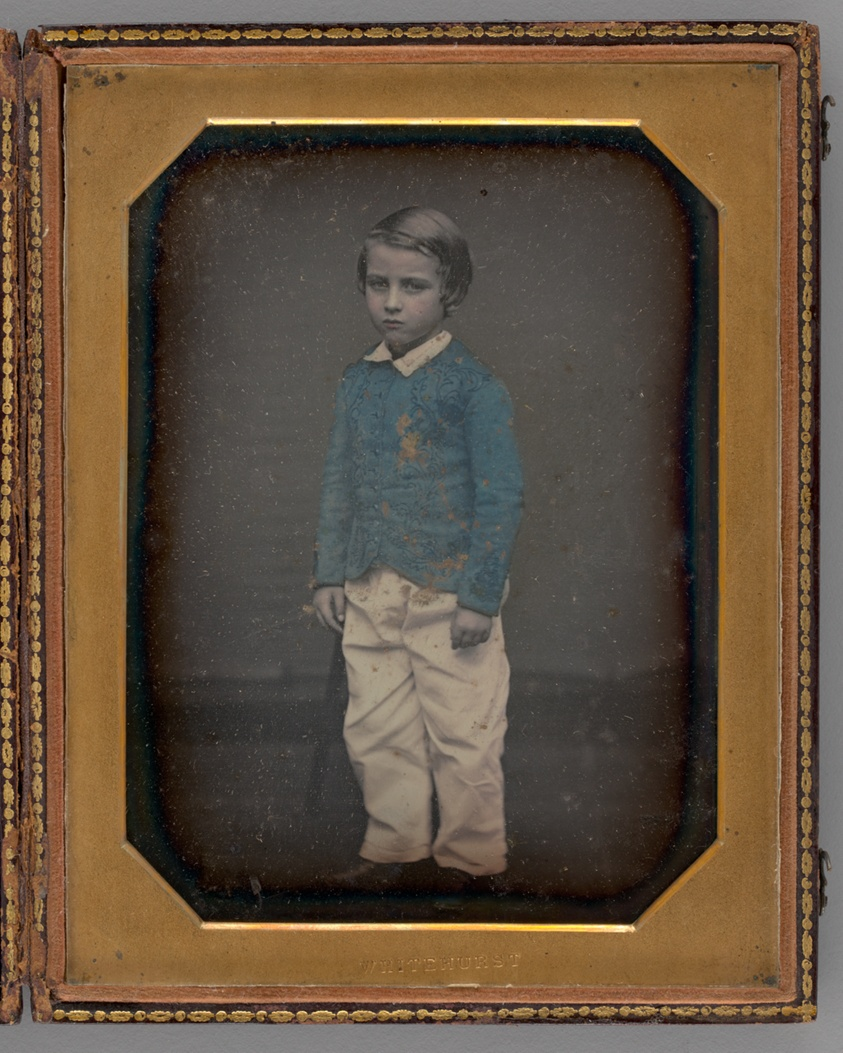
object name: Photograph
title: Untitled (Portrait of Standing Boy)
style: 19th century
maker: Jesse Harrison Whitehurst; American, 1819–1875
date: 1848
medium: Daguerreotype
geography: United States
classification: portrait; photograph; photographic process; photography; portrait; daguerreotype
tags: lundberg collection, portraits: male subject, portrait, children, boys, portraits, portraits: child subject